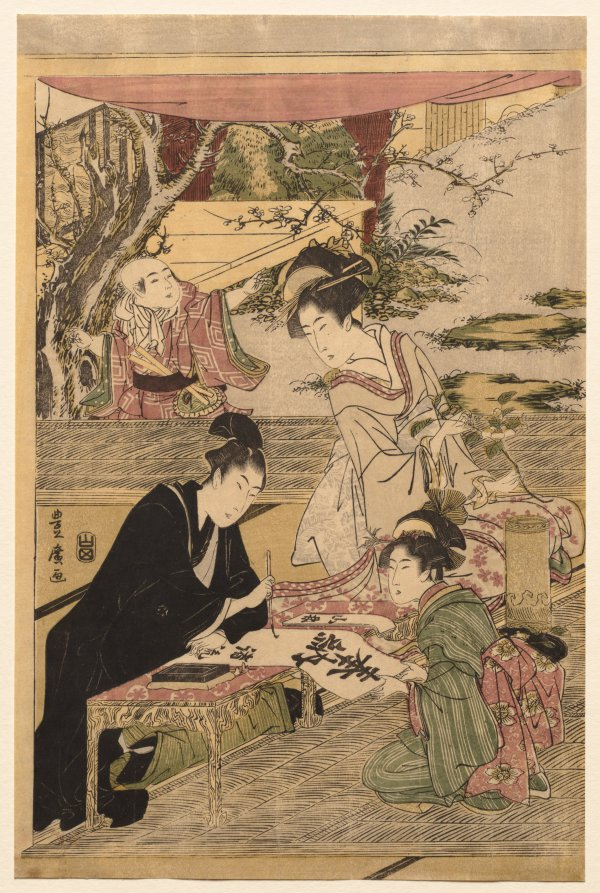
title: Young Man Writing at a Table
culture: Japan, Edo period (1615–1868)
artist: Utagawa Toyohiro (Japanese, 1733–1828)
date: c. 1800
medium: color woodblock print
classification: Print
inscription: Signature: Toyohiro ga Publisher: Yamadaya (Yamada)